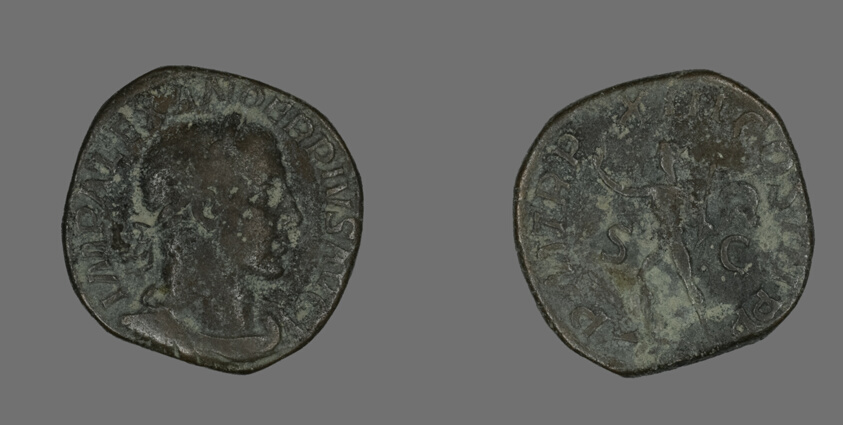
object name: Coin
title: Sestertius (Coin) Portraying Emperor Severus Alexander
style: roman (ancient, style or period)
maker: Roman, minted in Rome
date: 234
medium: Bronze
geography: Roman Empire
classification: coin; ancient art